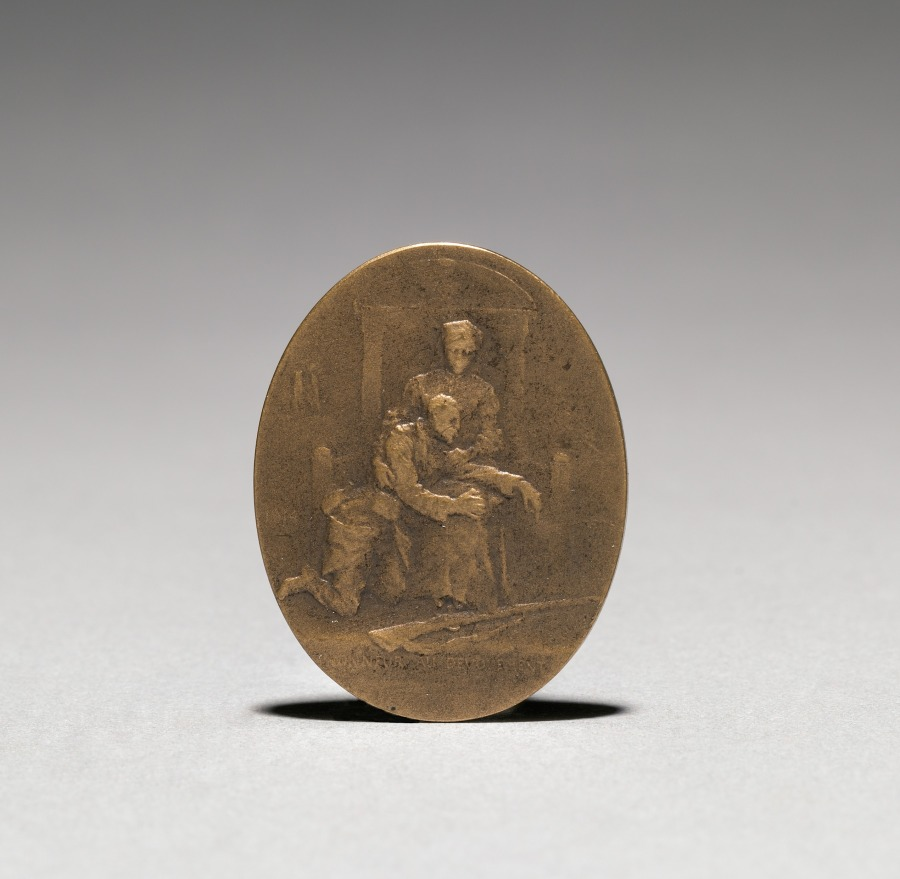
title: Medallion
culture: France, 19th-20th century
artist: Jean Paul Aube (French, 1837–1916)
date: 1915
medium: bronze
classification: Metalwork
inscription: "Honneur au devouement" (honor to self sacrifice); inscribed: "P. Aube."